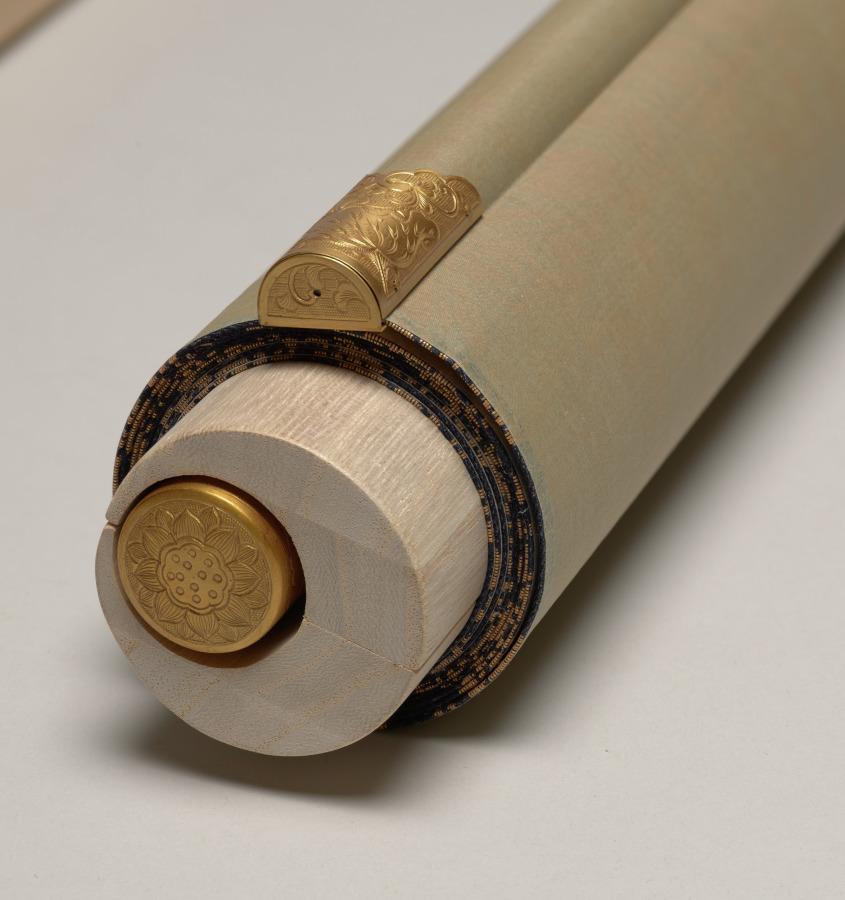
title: Shakyamuni with the Sixteen Benevolent Deities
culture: Japan, Nanbokuchō period (1336–92)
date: mid- to late 1300s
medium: Hanging scroll; ink, color, gold and cut gold on silk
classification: Painting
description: The historical Buddha Shakyamuni forms a triad with the bodhisattvas Fugen and Monju. Sixteen deities who protect the Buddhist scripture called the Great Perfection of Wisdom Sutra surround them. At the bottom left stands the Chinese monk Xuanzang, noted as a Buddhist scholar and translator of religious texts from India, including the Great Wisdom Sutra.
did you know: This painting would have been the main icon for ceremonial readings of the Great Perfection of Wisdom Sutra.